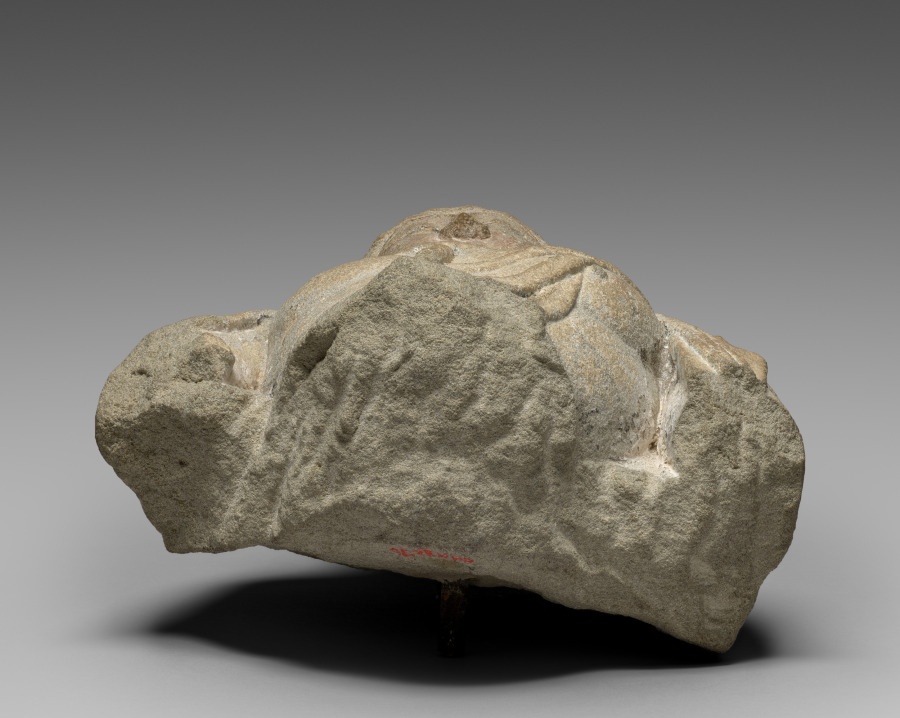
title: Bodhisattva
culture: China, Shanxi province, Taiyuan, Tianlongshan caves, Cave 6, Tang dynasty (618-907)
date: early 700s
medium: light gray limestone with traces of polychromy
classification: Sculpture